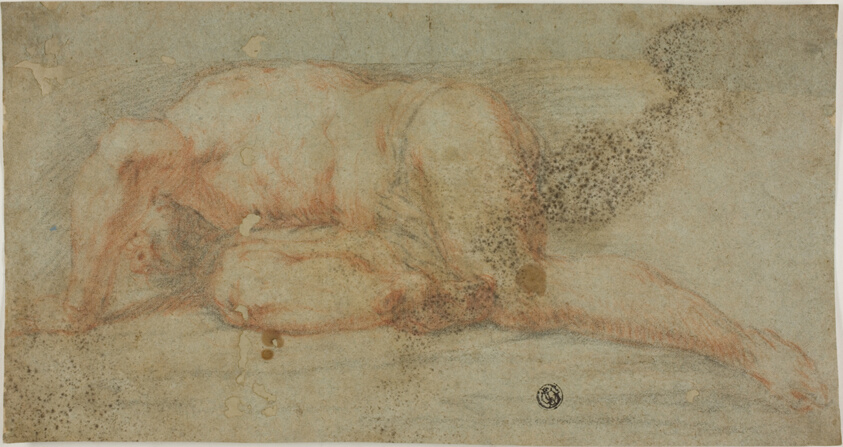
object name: Drawing and Watercolor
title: Man Lying Down, Arm Over Head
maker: Unknown Artist; European, n.d.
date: 17th century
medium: Red chalk, with black chalk, on blue laid paper, laid down on grayish-tan wove paper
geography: Europe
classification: chalk; drawings (visual works); prints and drawing